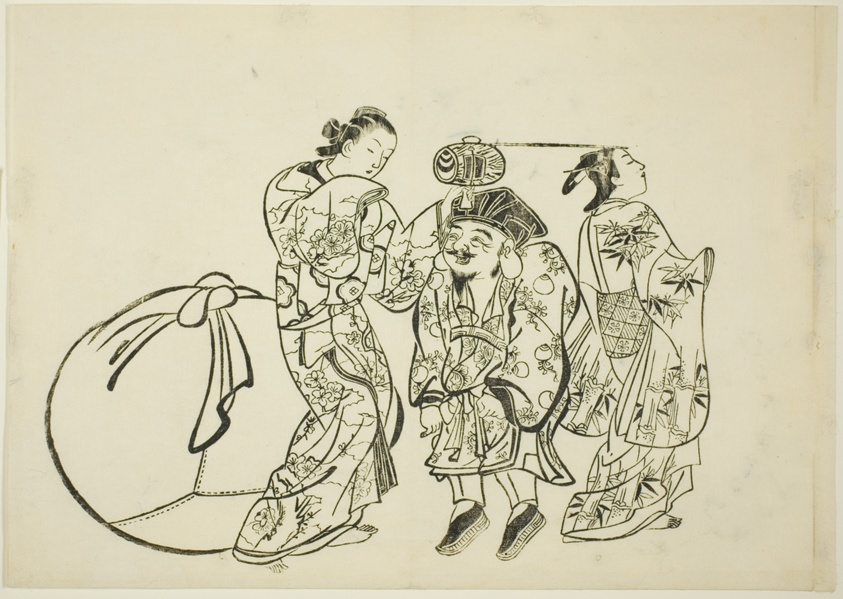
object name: Print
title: Measuring Daikoku's height, no. 5 from a series of 12 prints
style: Japanese (culture or style)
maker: Okumura Masanobu (Japanese, 1686-1764)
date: c. 1708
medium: Woodblock print; oban, sumizuri-e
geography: Japan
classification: woodblock print; print; asian art; woodblock